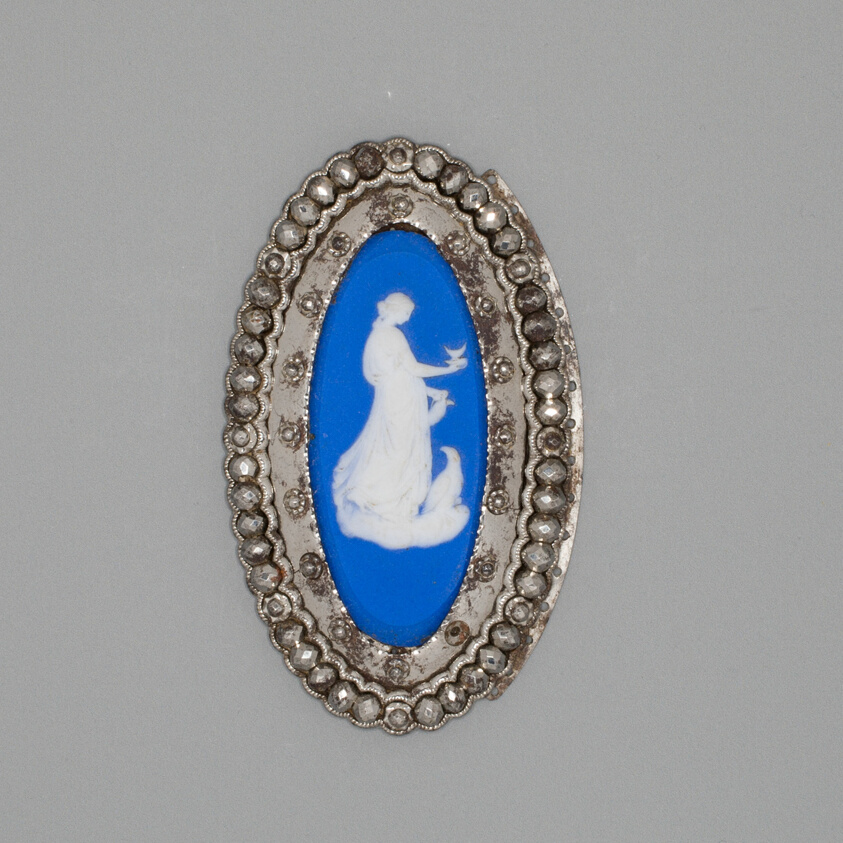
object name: Ceramics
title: Buckle with Hebe and Eagle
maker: Wedgwood Manufactory (England, founded 1759)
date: Late 18th century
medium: Stoneware (jasperware)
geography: Burslem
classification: buckle (strap accessory); accessories (object genre); costume accessory; stoneware; european decorative arts; ceramics